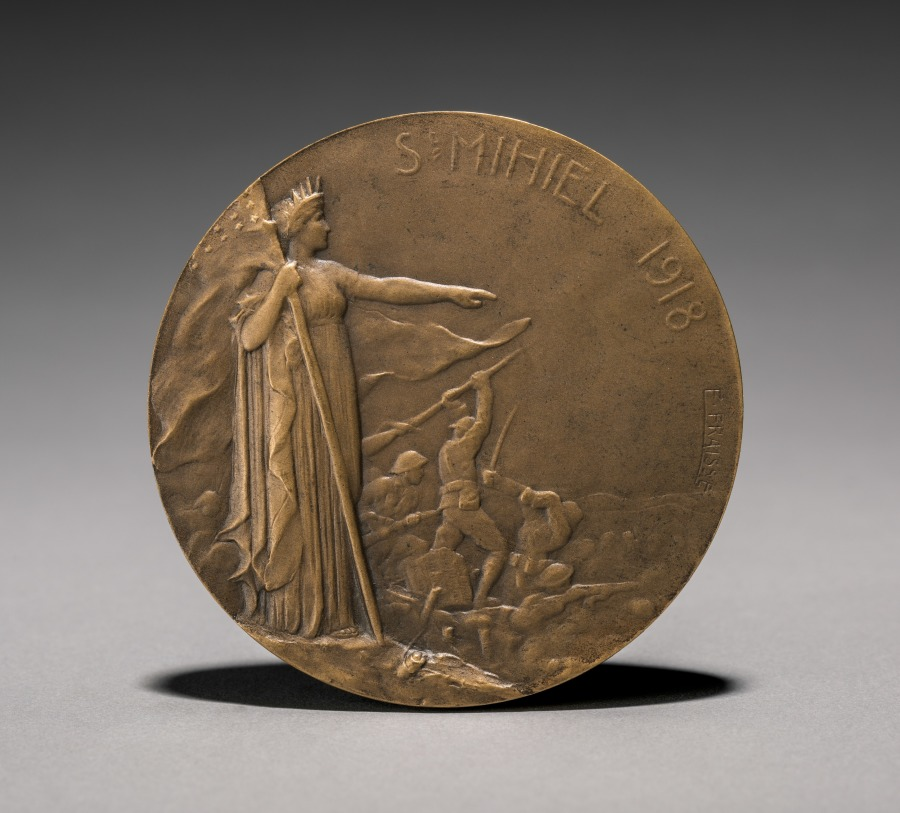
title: Medal (obverse)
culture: France, 20th century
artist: Edouard Fraisse (French, 1880–1945)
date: 1900s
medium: bronze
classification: Metalwork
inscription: "St. Mihiel 1918."